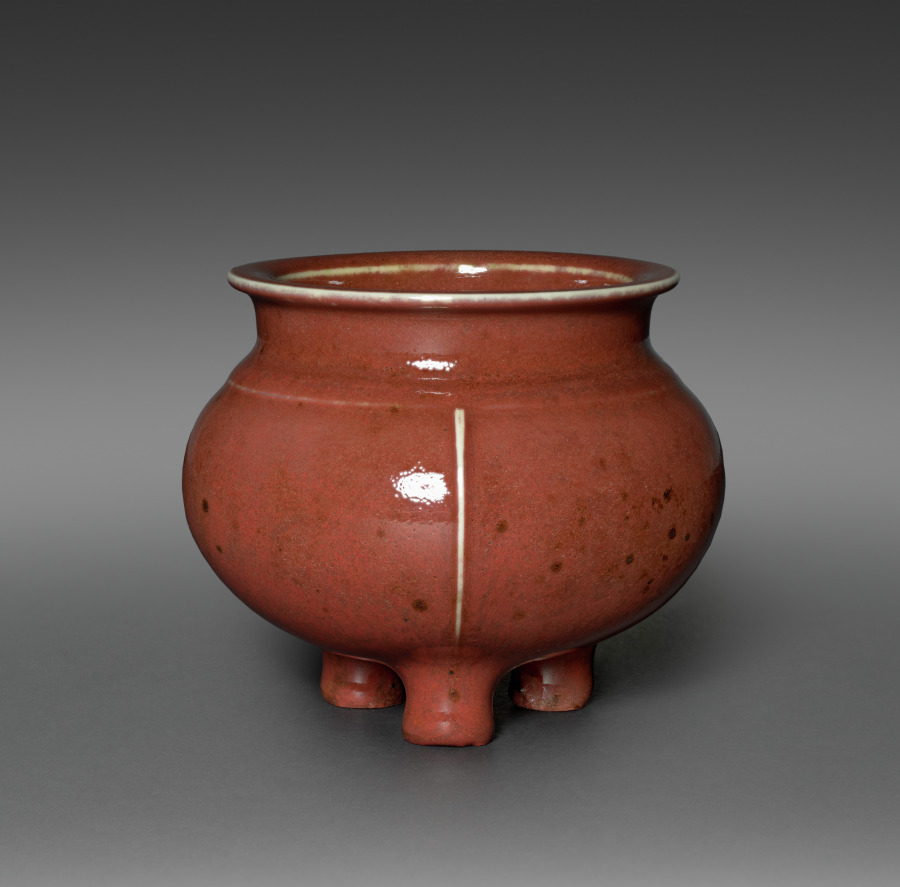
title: Incense Burner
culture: Japan, Meiji period (1868–1912)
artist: Seifū Yohei III (Japanese, 1851–1914)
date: 1893–97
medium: Porcelain with molded design, crimson glaze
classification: Ceramic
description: Seifū Yohei III made incense burners in a wide variety of designs and styles. The glaze is described as “crimson glaze” (kōyū); it is also dappled with dark spots of varied opacity and tiny pores throughout, which gives the container a rich, textured effect. Yohei III had the silver lids produced outside the studio by metalwork specialists. For this tripod, they decorated the lid with a variety of flowers.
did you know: This tripod incense burner has linear molded decorations that run around the base of the collar and down the legs.